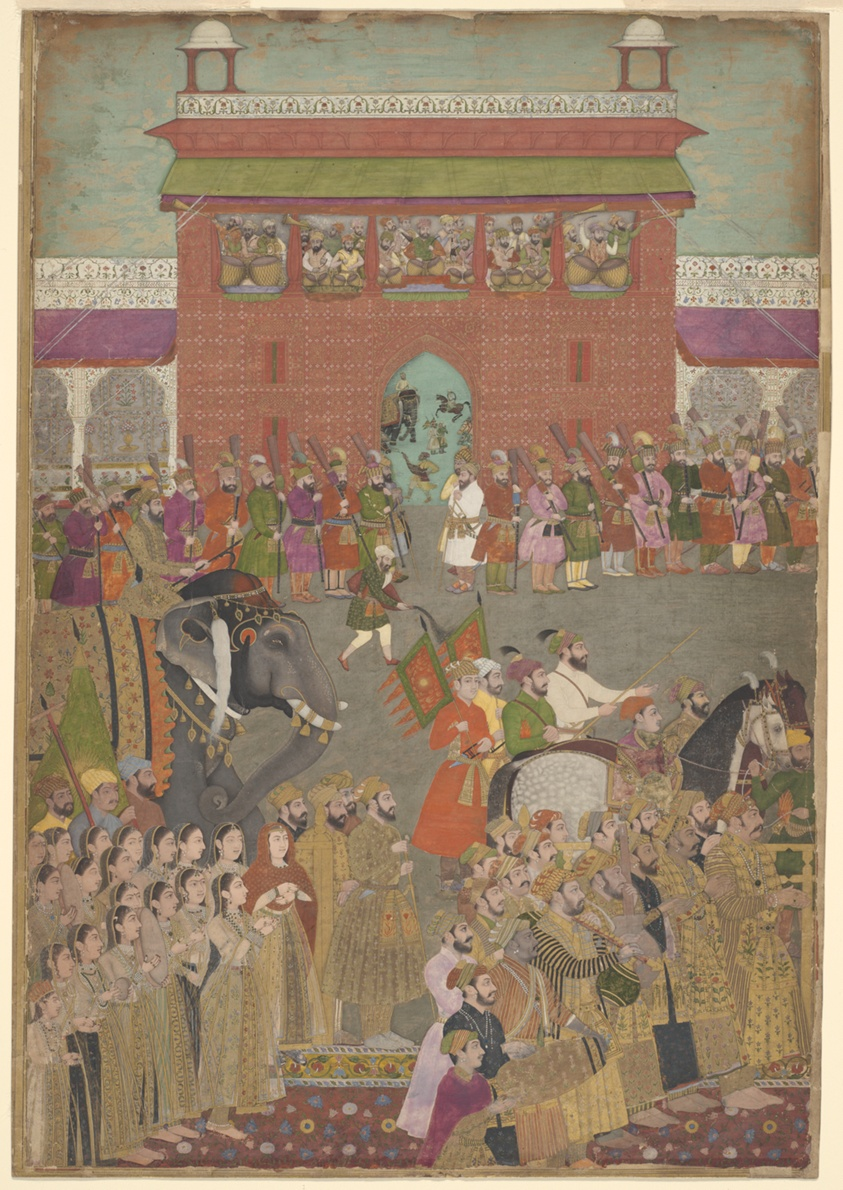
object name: Painting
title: A Procession Scene with Musicians, from a copy of the Padshanama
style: South Asian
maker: India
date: c. 1650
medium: Opaque watercolor and gold on paper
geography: India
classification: miniature painting; painting; asian art